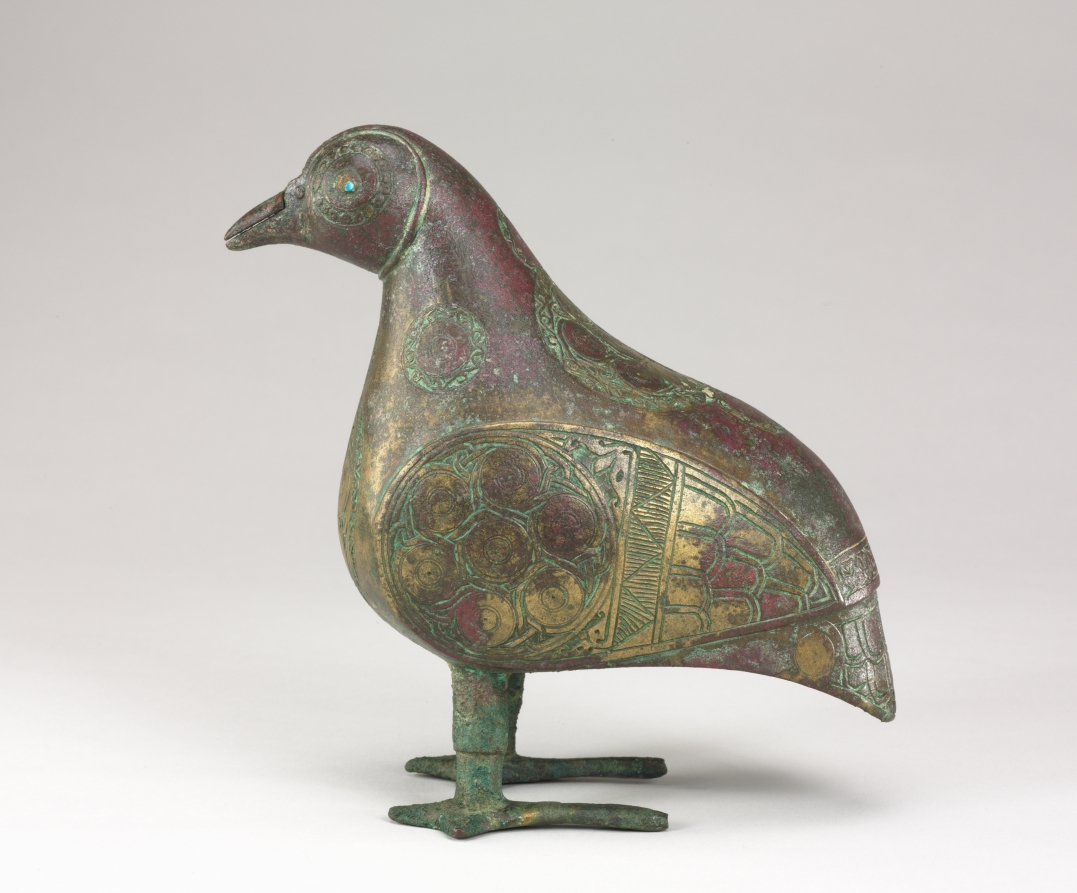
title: Bird-shaped Vessel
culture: Iran, Seljuq period (1037–1194)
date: 1100s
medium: bronze, cast, with chased and chiseled decoration; eyes inlaid with blue glass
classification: Metalwork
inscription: Kufic inscription above tail feathers, undeciphered, possibly pseudo-inscription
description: This bird-shaped vessel may have been used as a medieval water vessel (aquamanile) for pouring water used in handwashing—an important element of secular and sacred rituals. In this piece, water could have been placed in the vessel through a hole in the bird’s chest and then poured out through the hinged beak. Birds in Islamic art often represented messengers and protectors, or symbolized freedom of the spirit and soaring of the soul. Possibly the blue-green eyes were considered good luck charms to protect the owner from the evil eye and to ward off misfortune.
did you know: There is an undeciphered Kufic inscription above the bird's tail feathers.